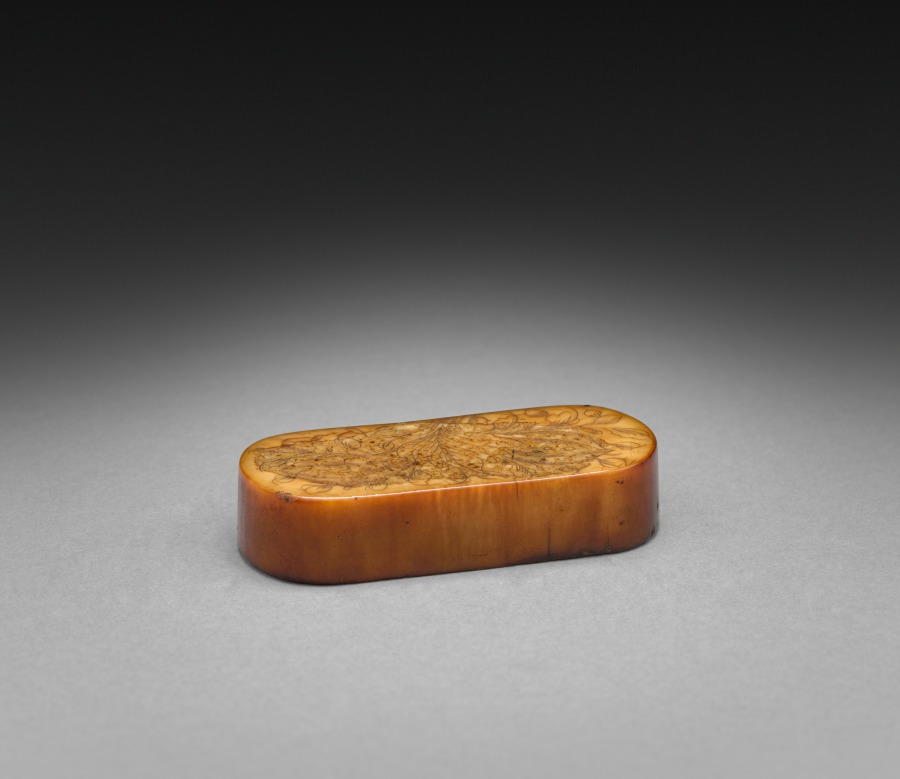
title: Box (lid)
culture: China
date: early 1900s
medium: ivory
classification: Ivory